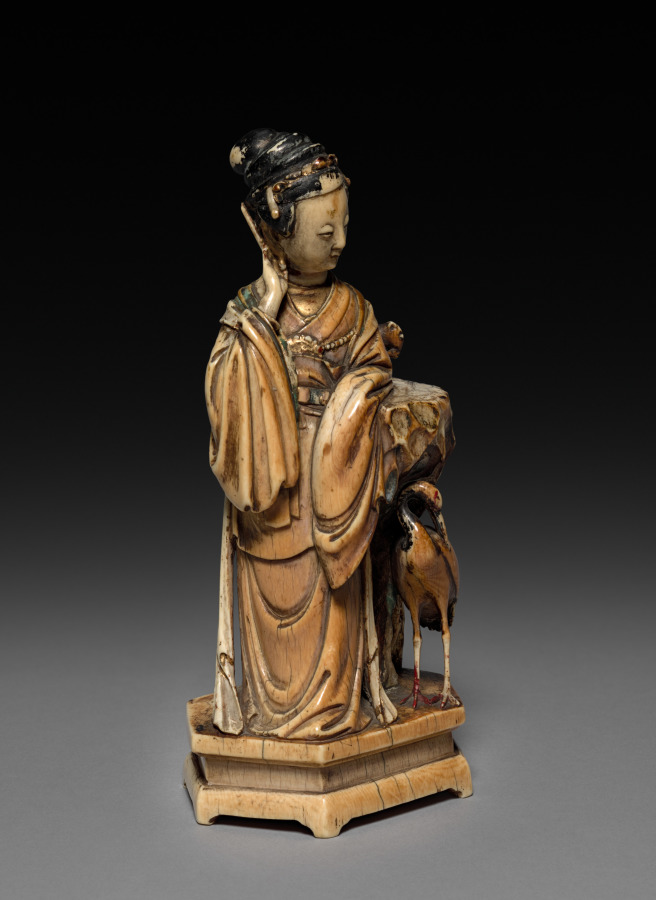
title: Female Figure with Crane and Squirrel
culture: China, Qing dynasty (1644-1911), Kangxi reign (1662-1722)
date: 1662–1722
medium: ivory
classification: Ivory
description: In the Qing dynasty (1644–1911), luxury items became more affordable to larger parts of the society, including women, merchants, and literati in non-official positions. Imperial patronage and a growing urban population encouraged consumption of luxury goods and local craftmanship. This ivory form of a woman with a crane illustrates the superb skills and the creative mind of the talented artisan who sought clients on a competitive market.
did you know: The ivory has aged to a rich amber, while traces of its original red and green paint remain on the woman’s cuffs and collar.